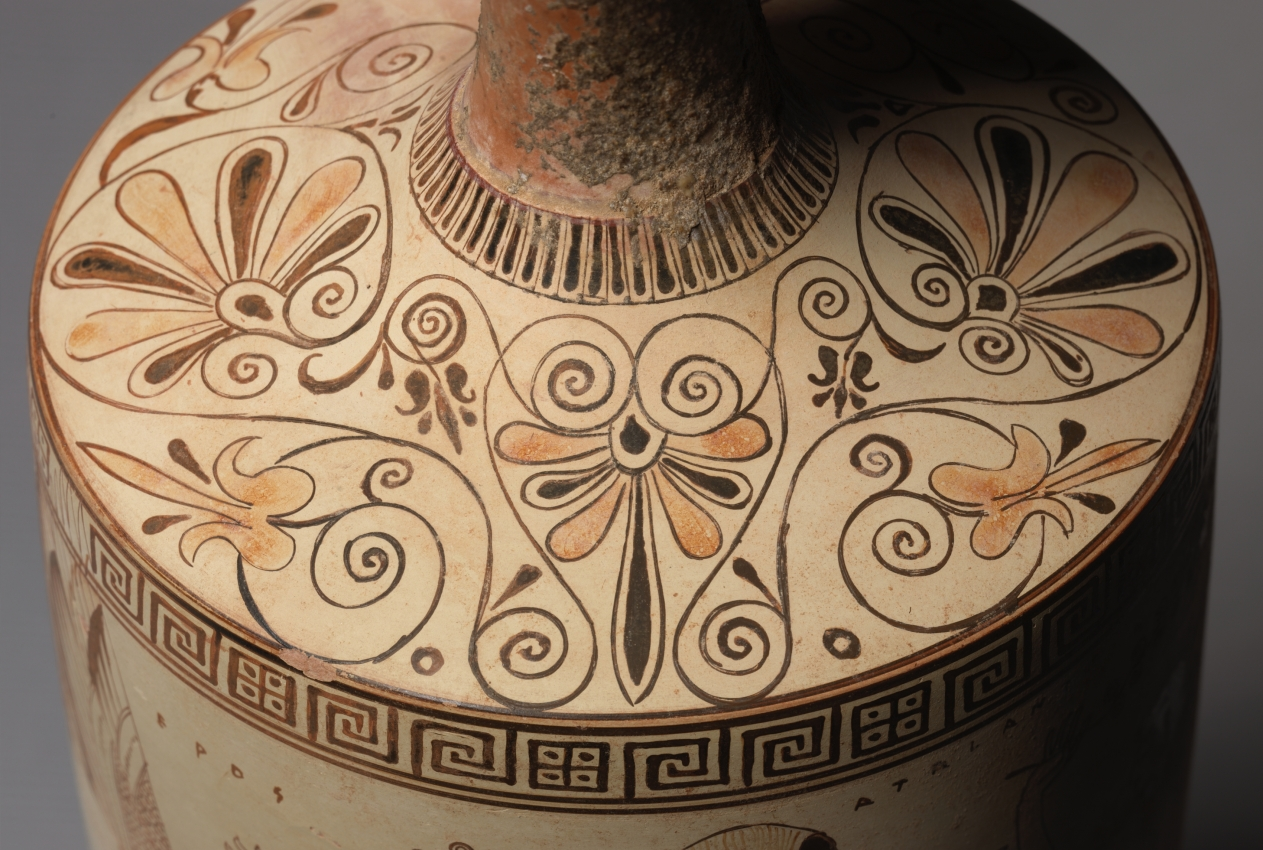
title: White-Ground Lekythos (Oil Vessel): Atalanta and Erotes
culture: Greek, Attic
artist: attributed to Douris (Greek, Attic, active c. 500–470 BCE)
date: 500–490 BCE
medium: ceramic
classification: Ceramic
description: Known as "white-ground" because of the white clay slip applied as a surface for figural decoration, vases of this type give some idea of the appearance of lost ancient large-scale wall paintings. Both remarkably well preserved and masterfully composed, the images cover the entire circumference of the vase. At the center, Atalanta, the virgin huntress renowned for both her speed and her opposition to marriage, races to the right while looking back at Eros, the winged god of love; both figures are named. This Eros, bounding forward, tries to crown her, while two additional Erotes (also named) further hem her in. Love will win.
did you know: Eros, god of love, appears three times on this vase.